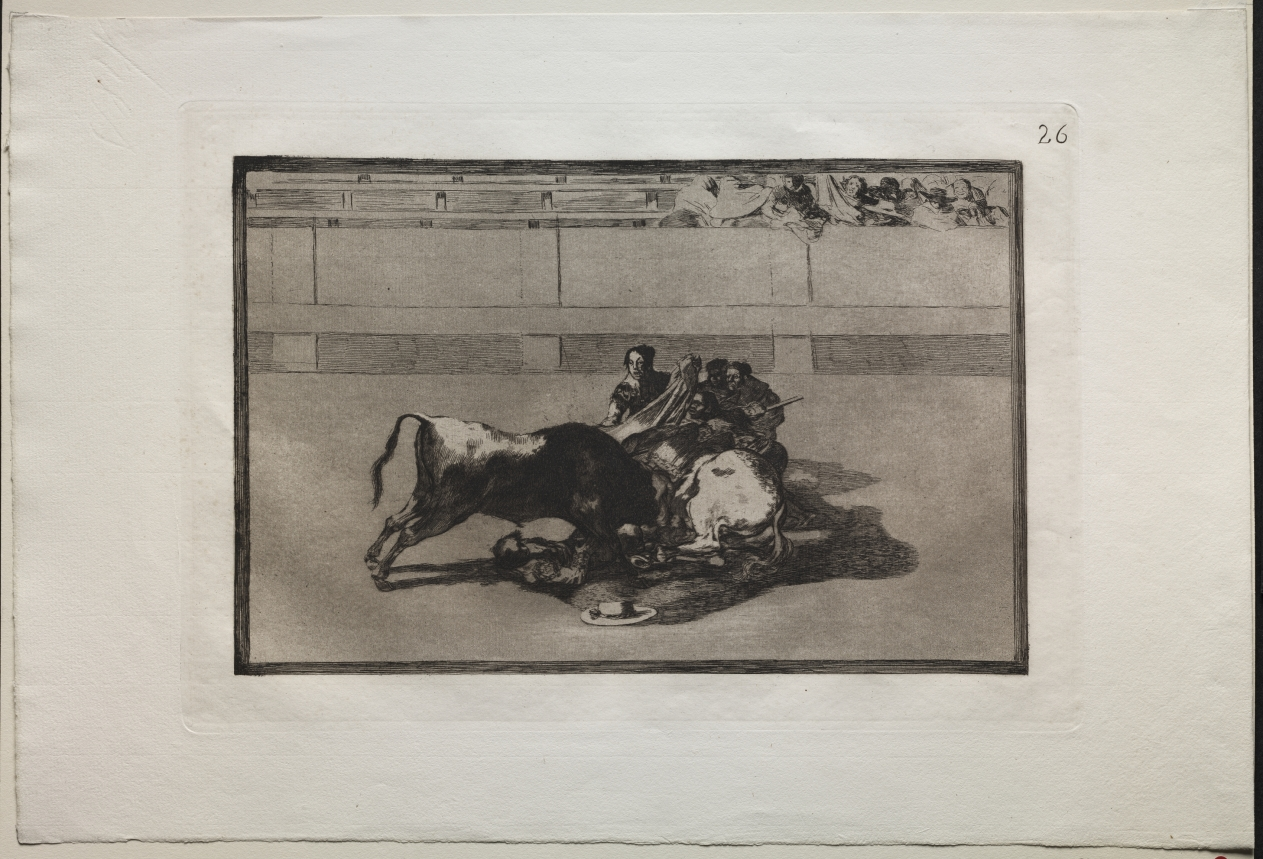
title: Bullfights: A Picador is Unhorsed and Falls Under the Bull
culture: Spain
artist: Francisco de Goya (Spanish, 1746–1828)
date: 1816, printed 1876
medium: engraving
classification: Print